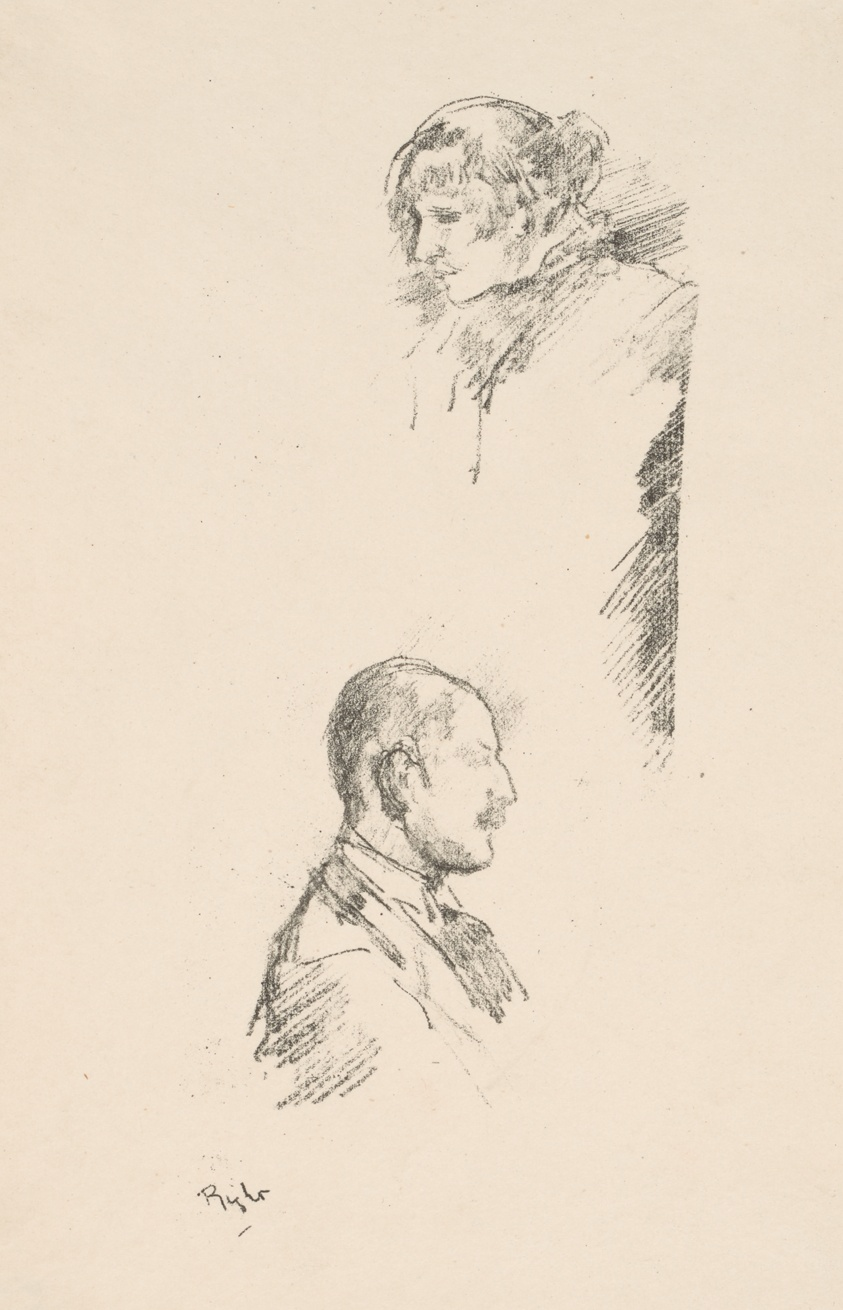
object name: Print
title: Sketches of Miss Philip and Mr. A. Studd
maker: James McNeill Whistler (American, 1834-1903)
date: 1895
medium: Transfer lithograph in black on ivory wove proofing paper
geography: United States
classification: transfer lithograph; lithograph; print; prints and drawing; paper